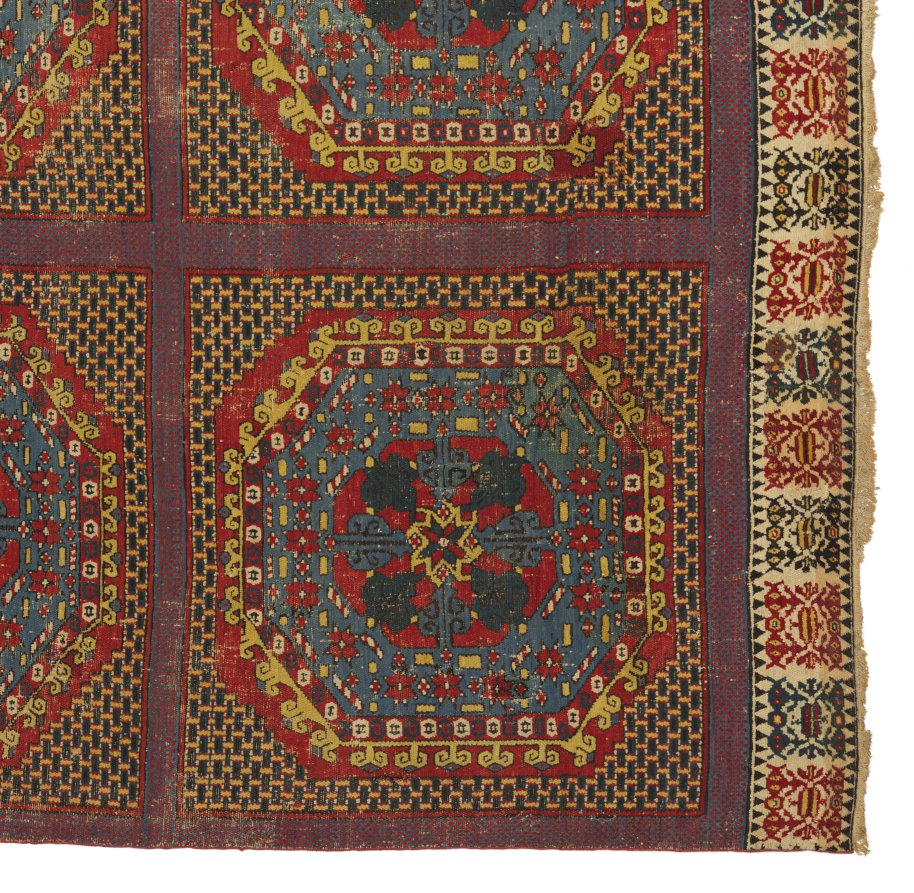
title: Spanish Carpet with a Turkish Pattern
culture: Spain, Alcaraz?, Mudejar, 15th century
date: c. 1450–1500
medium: wool, knotted pile: Spanish knot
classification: Carpet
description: Muslim weavers in Spain manufactured colorful woolen carpets with patterns derived from native Iberian designs, luxury silks, and imported Turkish carpets, such as this rare example. It is the only known carpet with this pattern of octagons framing a radiating central star. It is related to so-called large-pattern Holbein carpets, named after the Flemish painter Hans Holbein the Younger (1497-1543) who represented them in his paintings. This relatively well preserved 15th-century carpet is said to have come from a convent in Spain.